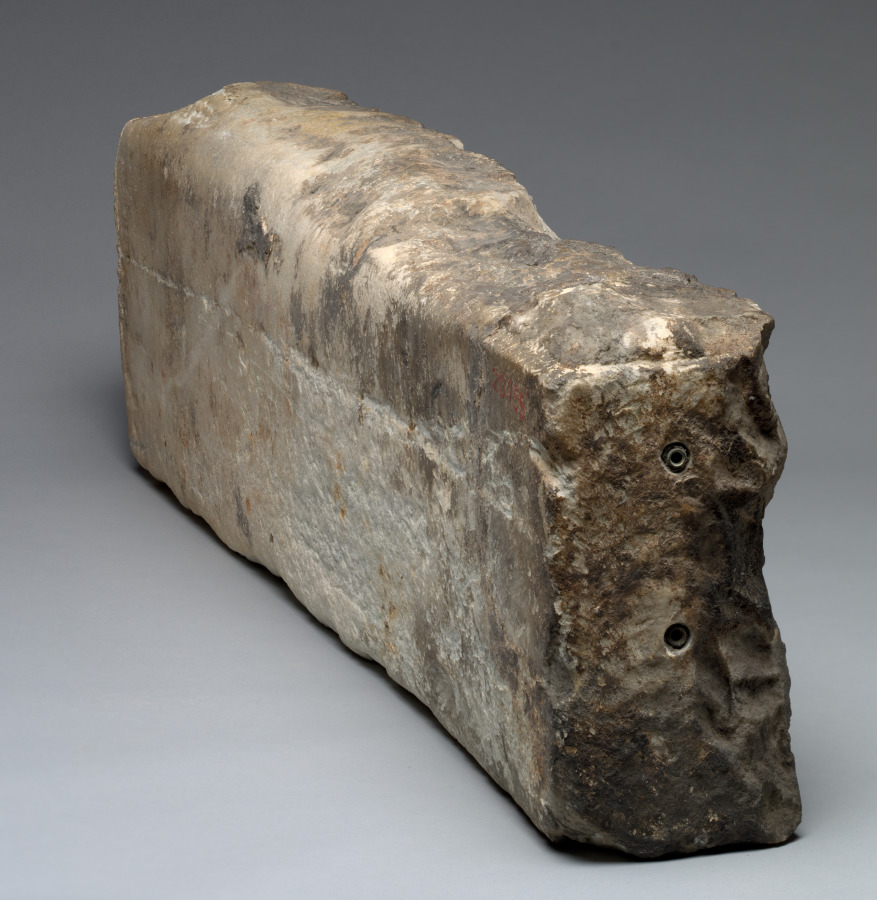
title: Fragment of a Panel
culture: Italy, Rome, Longobardic Style, Migration period, 8th-9th centuries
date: 700s-800s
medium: marble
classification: Sculpture